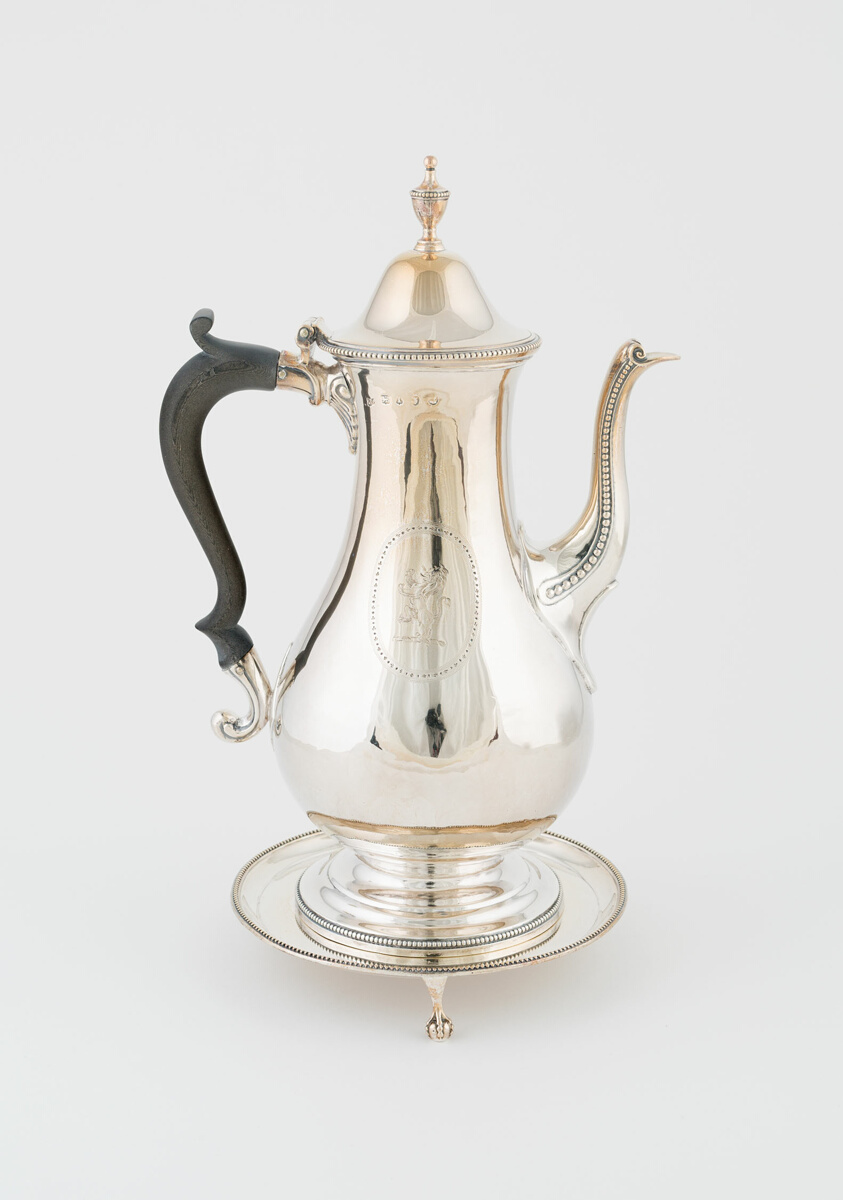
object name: Metalwork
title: Coffee Pot and Stand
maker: Hester Bateman; English, 1709-1794; London, England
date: 1786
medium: Silver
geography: London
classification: silver; metalwork; european decorative arts